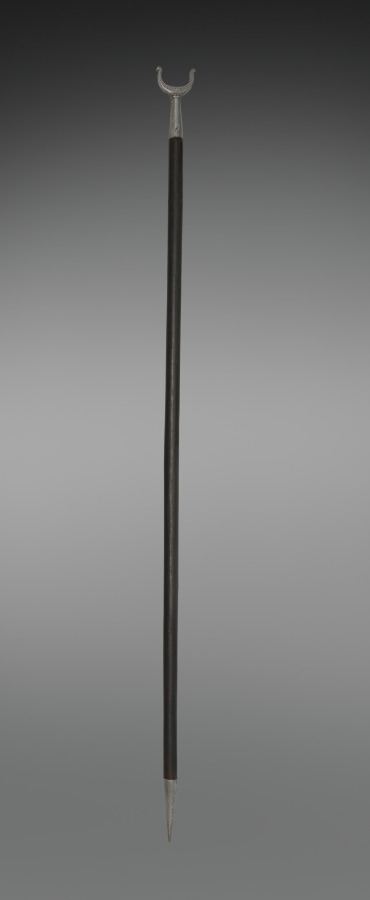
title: Gun Rest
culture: Italy, 17th century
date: 1600s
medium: steel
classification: Arms and Armor